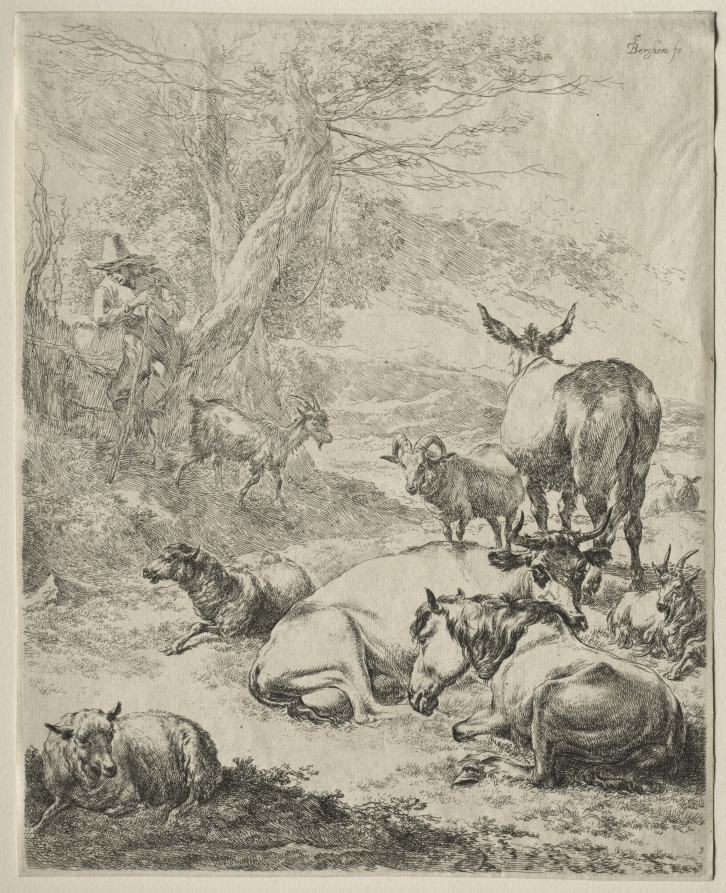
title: The Herd at Rest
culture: Netherlands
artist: Nicolaes Berchem (Dutch, 1620–1683)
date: c. 1652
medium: etching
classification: Print